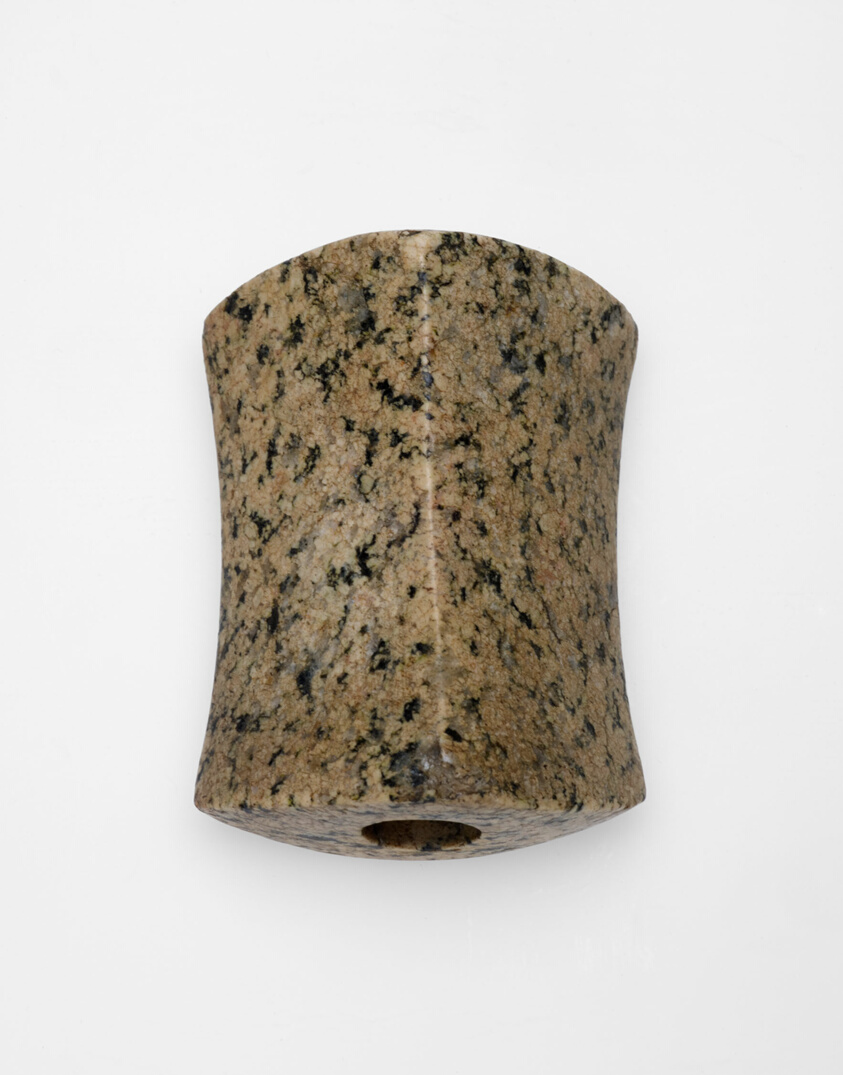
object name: Sculpture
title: Saddle-Face Bannerstone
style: archaic america, native american, midwestern, ancient, Arts of the Americas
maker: Archaic (Posey County, Indiana, United States)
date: c. 2600 BCE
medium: Granite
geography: Indiana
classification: weapon; stone; art of the americas; sculpture